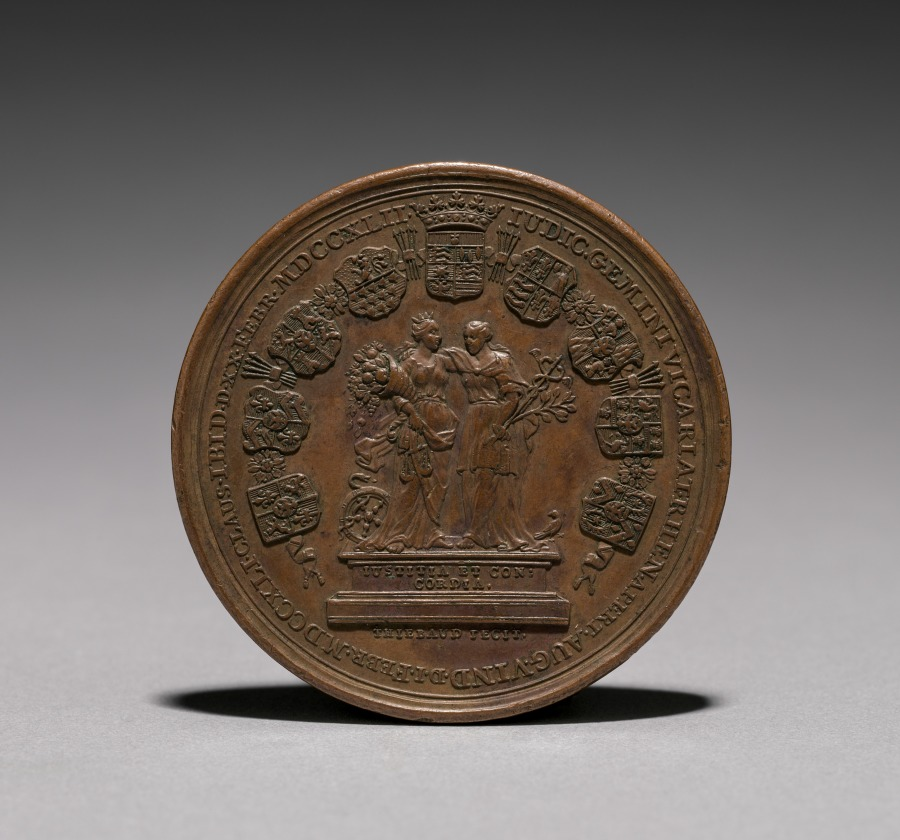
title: Augsburg Medal (obverse)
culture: France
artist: Thiebaud (French)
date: 1742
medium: bronze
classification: Metalwork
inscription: Carol Alb. et Carol Phil. S.R.L. in Part. Rhen. Suev. et Franc. iur. Prov. et. con. Vic. Utrumq. unum.